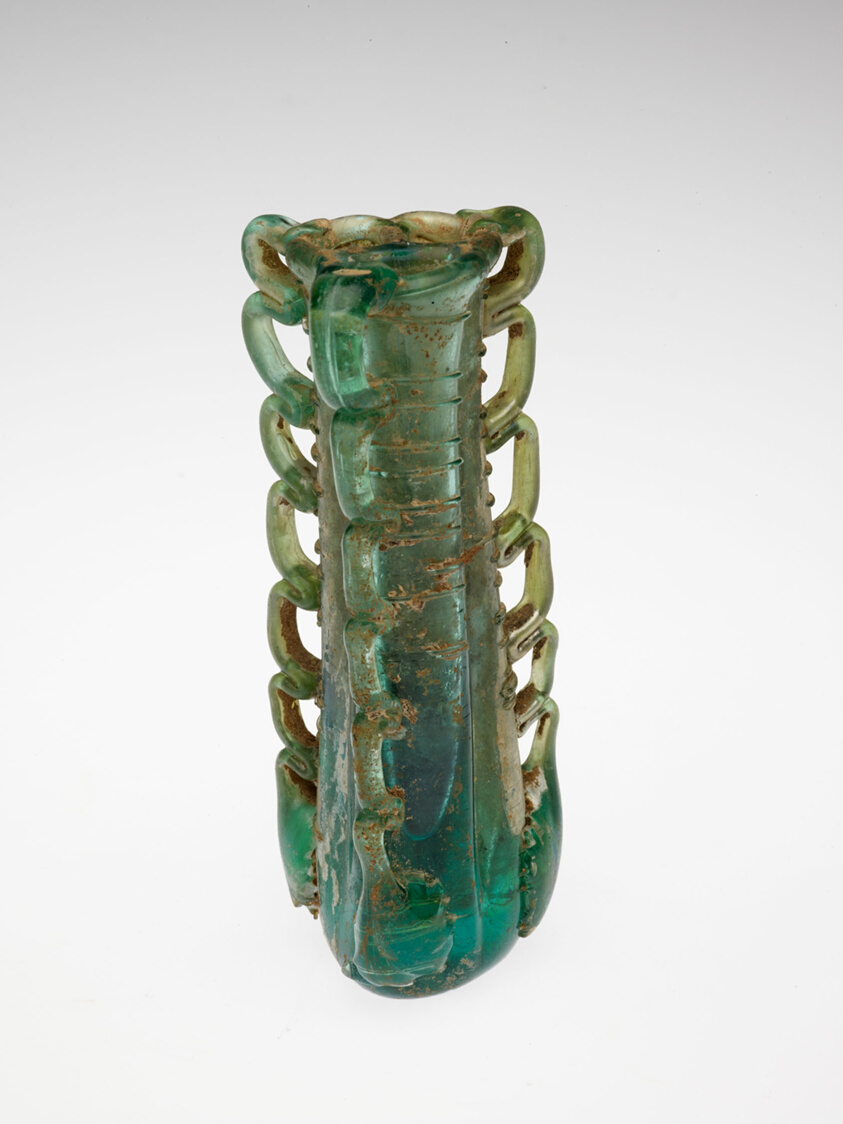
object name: Vessel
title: Kohl Container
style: palestinian, syrian, ancient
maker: Byzantine; Eastern Mediterranean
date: 5th-6th century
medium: Glass, blown technique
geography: Levant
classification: personal grooming / hygiene / cosmetic container; glass; vessel; ancient art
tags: beauty, rituals